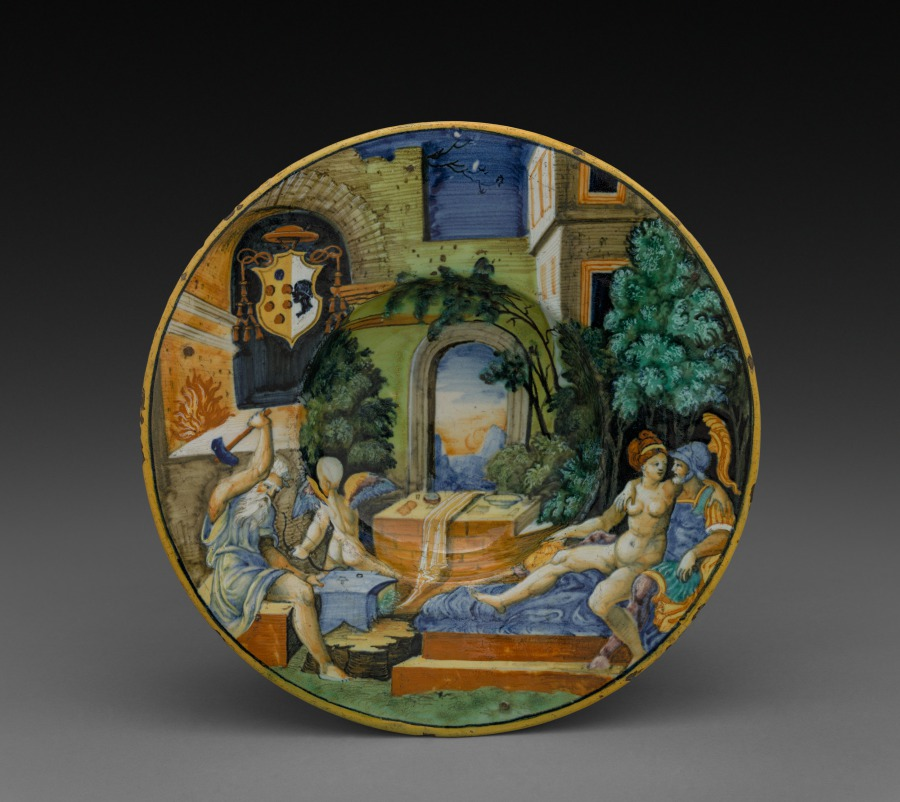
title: Plate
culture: Italy, Pesaro, 16th century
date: c. 1540–1544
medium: tin-glazed earthenware (maiolica)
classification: Ceramic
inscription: on back, in blue: "Vulcano Venere et Marte" (Vulcan Venus and Mars).